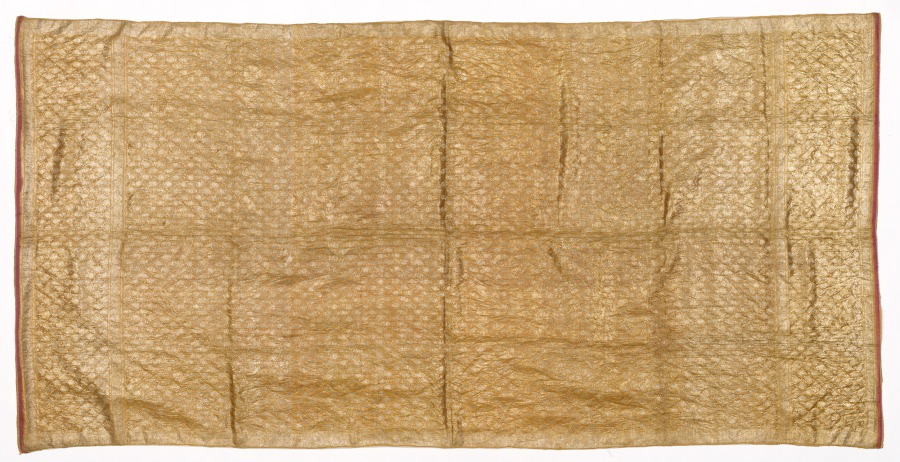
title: Sari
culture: India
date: early 1900s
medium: silk, metallic thread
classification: Textile